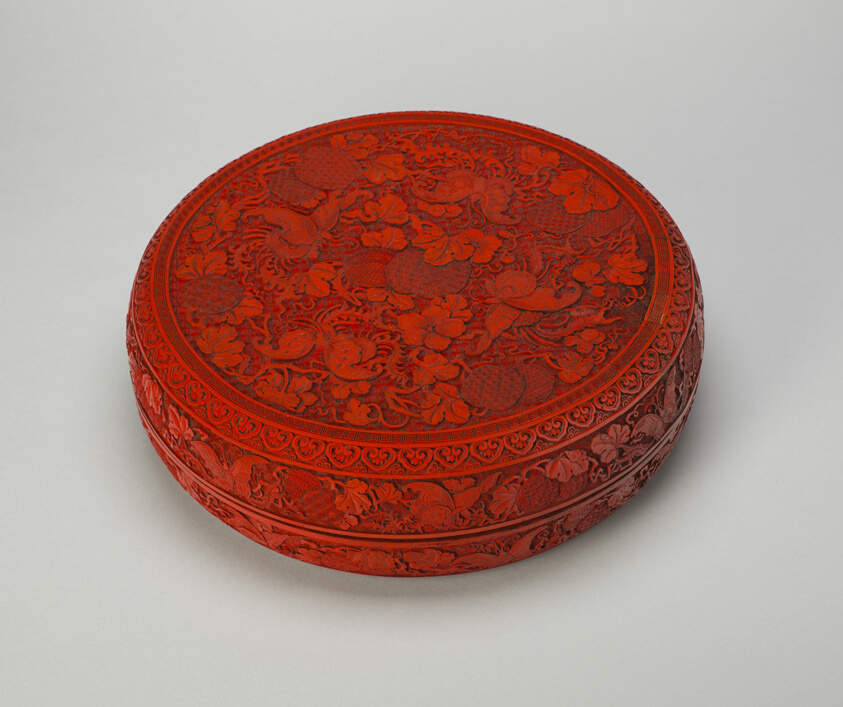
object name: Vessel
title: Covered Box with Butterflies, Gourds, and Scrolling Vines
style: Chinese (culture or style)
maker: China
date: Qing dynasty (1644–1911), Yongzheng (1723–35) or early Qianlong period (1736–95), 18th century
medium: Carved cinnabar lacquer on wood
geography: China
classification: lacquer; lacquerware; asian art; vessel